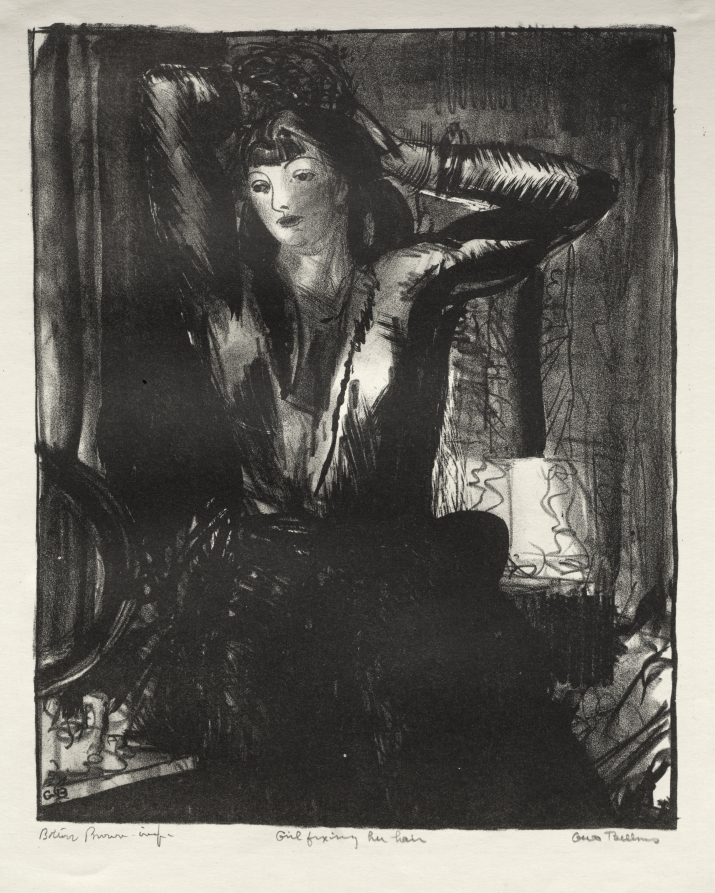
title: Girl Fixing Her Hair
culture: America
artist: George Bellows (American, 1882–1925)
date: 1924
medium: lithograph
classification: Print